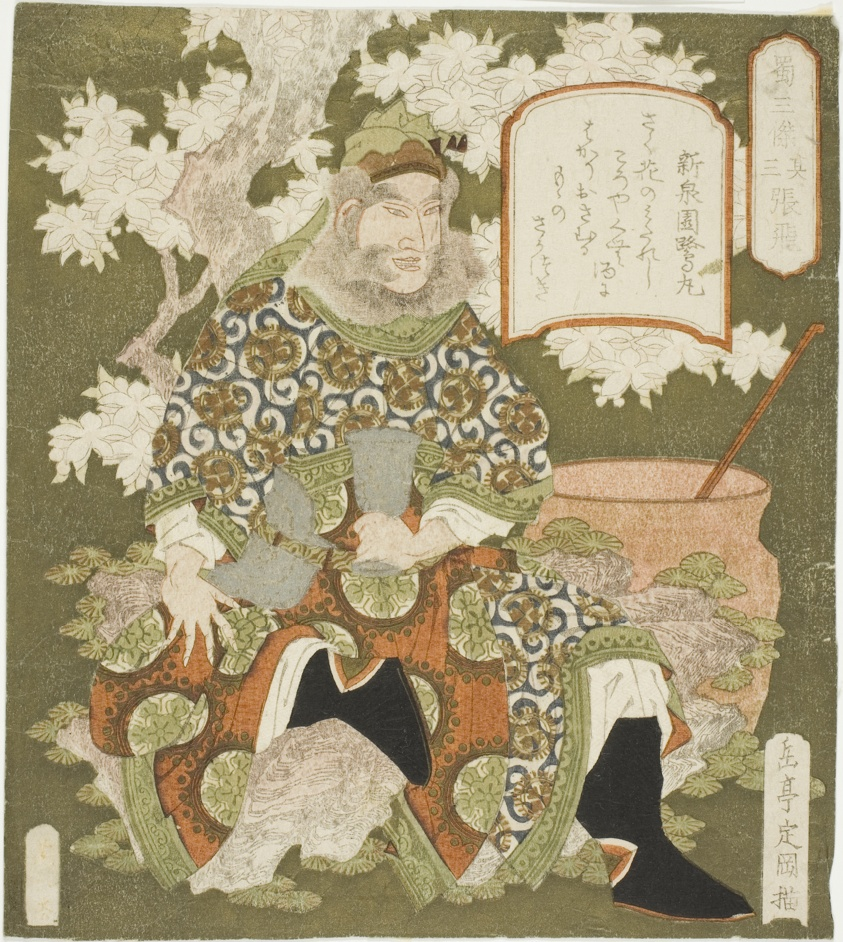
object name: Print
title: No. 3: Zhang Fei (Sono san: Chohi), from the series "Three Heroes of Shu (Shoku sanketsu)"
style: Japanese (culture or style)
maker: Yashima Gakutei (Japanese, 1786 (?)-1868)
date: c. 1824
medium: Color woodblock print; shikishiban, surimono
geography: Japan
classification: woodblock print; print; asian art